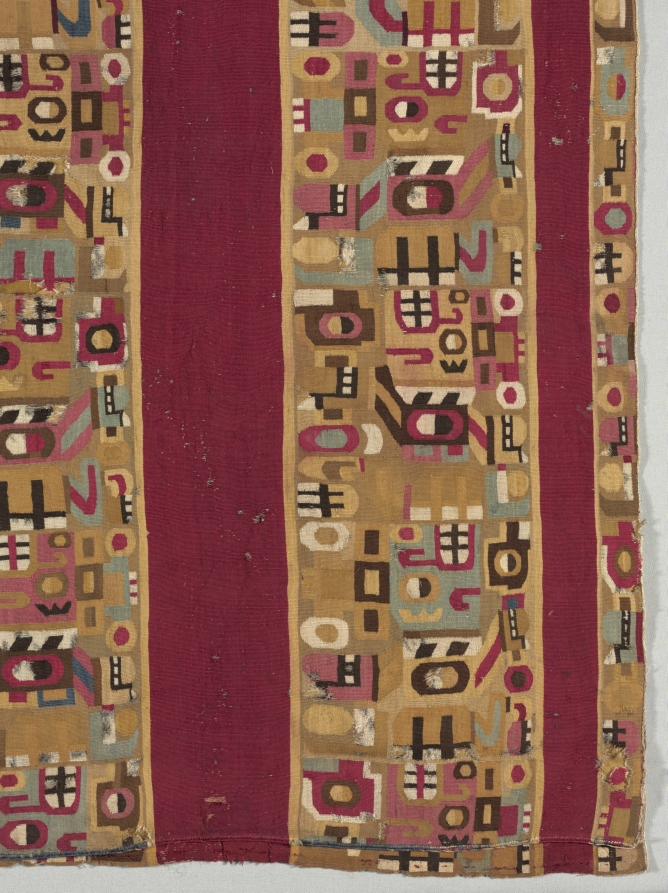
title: Tunic with Sacrificer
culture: South America, Peru, Central Andes, Middle Horizon, Wari people, 7th-11th century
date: 600–1000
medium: camelid-fiber, cotton; tapestry weave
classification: Textile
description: An extremely abstract supernatural sacrifice repeats in different colors and orientations across the body of this tunic, which was shortened on one side in antiquity. Look for the toothy black-and-white mouth in the sacrificer's upward-gazing head; other facial features include a button nose and a vertically divided eye. The figure holds the L-shaped haft of an axe behind its back and, at the front of its body, a short staff with a severed, upside-down human head on the top.